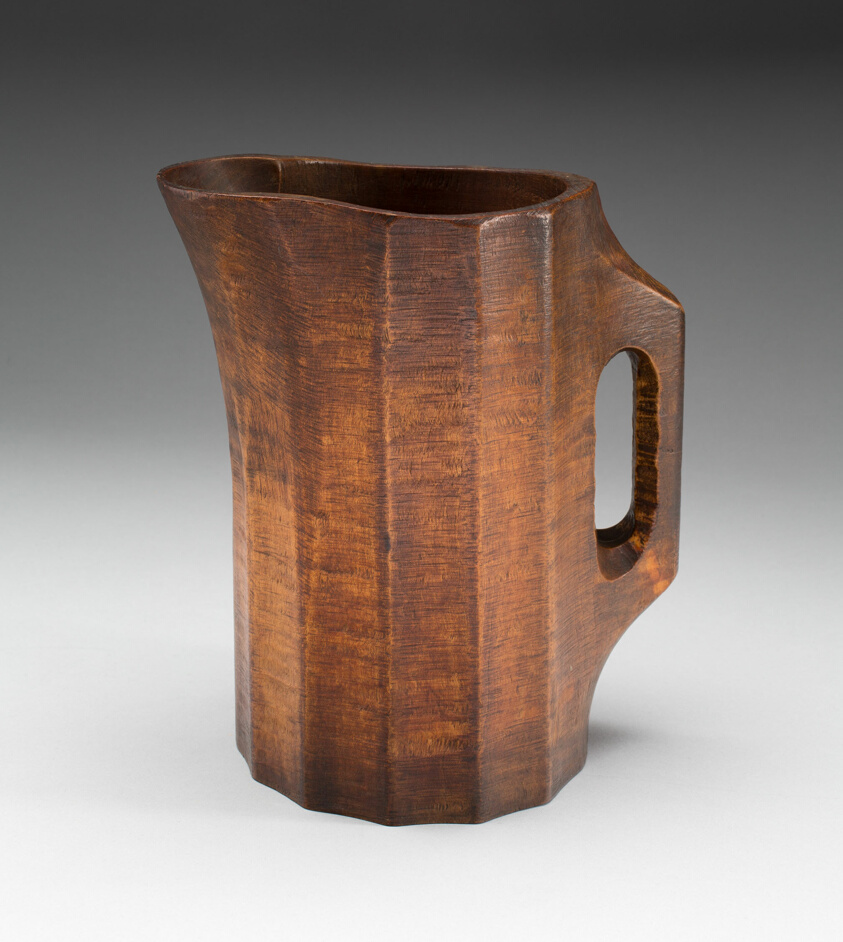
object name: Decorative Arts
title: Pitcher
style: Folk Art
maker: Artist unknown (American, active 19th century)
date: 1820–60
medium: Maple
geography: United States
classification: wood; american decorative arts; american arts; decorative arts